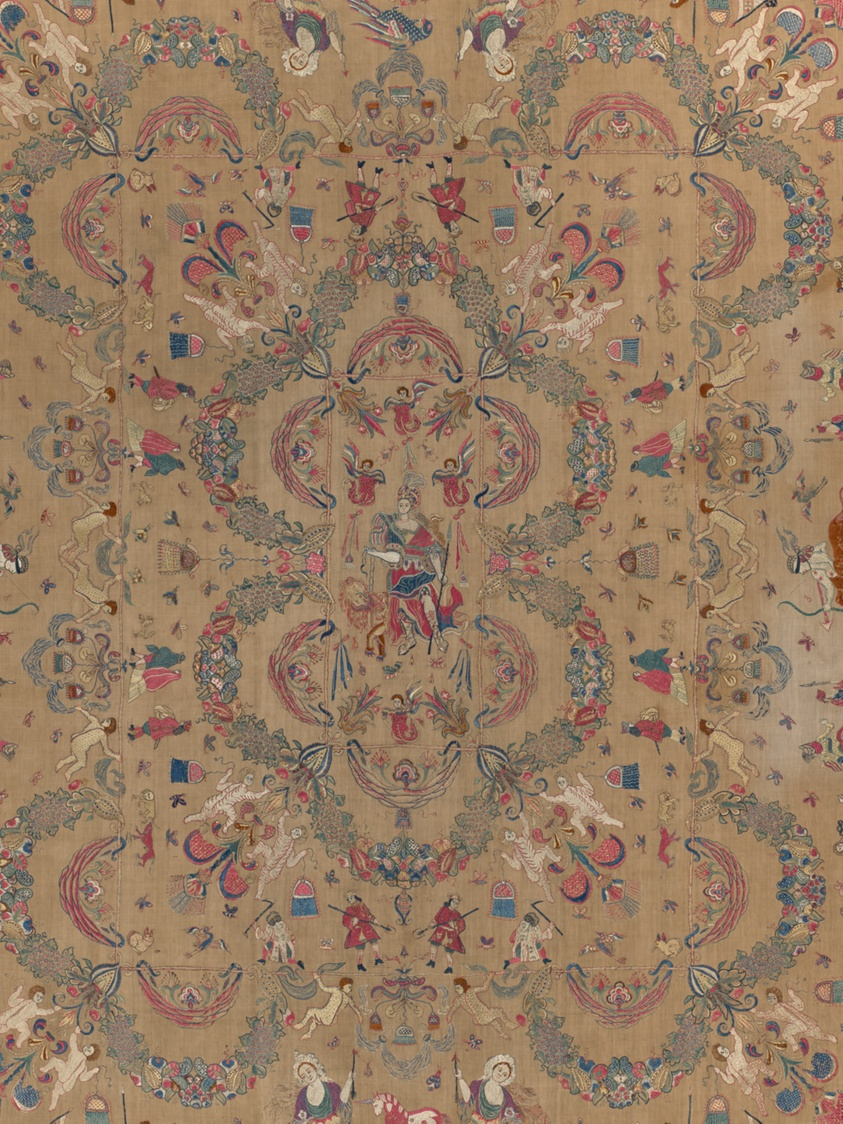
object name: Coverings and Hangings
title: Embroidery with Allegorical and Mythological Motifs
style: peruvian, 17th Century, latin american, colonial Peru, south american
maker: Peru, probably Lima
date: 1660s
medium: Silk embroidery on cotton foundation textile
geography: South America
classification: embroidery; textile; ceremonial object; needlework (visual works)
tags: mythological figures, warriors, robes, lions, female figures, bows and arrows, archers, ceremonial objects, power